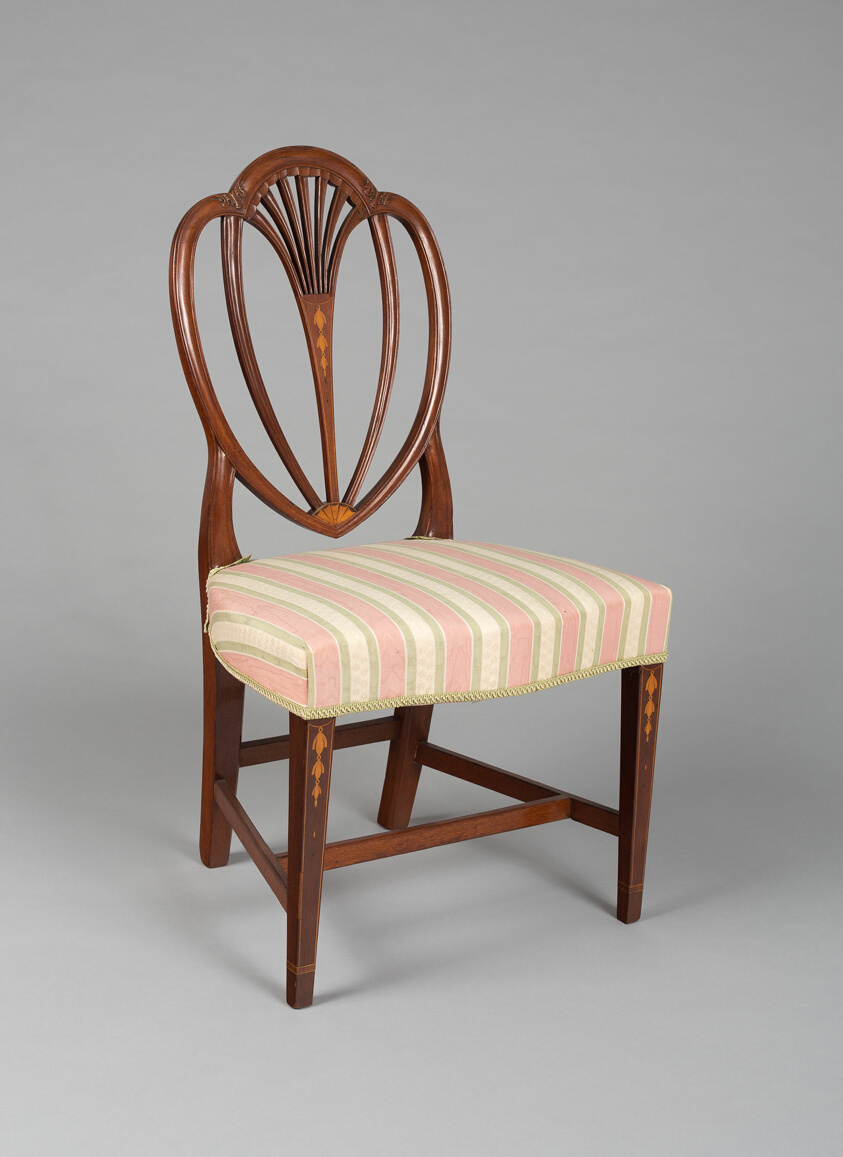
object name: Furniture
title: Side Chair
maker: Artist unknown (American, 18th–19th century); Baltimore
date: 1790–1800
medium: Mahogany, walnut, ash, and upholstery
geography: Baltimore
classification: seating; furniture; american decorative arts; american arts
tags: furniture